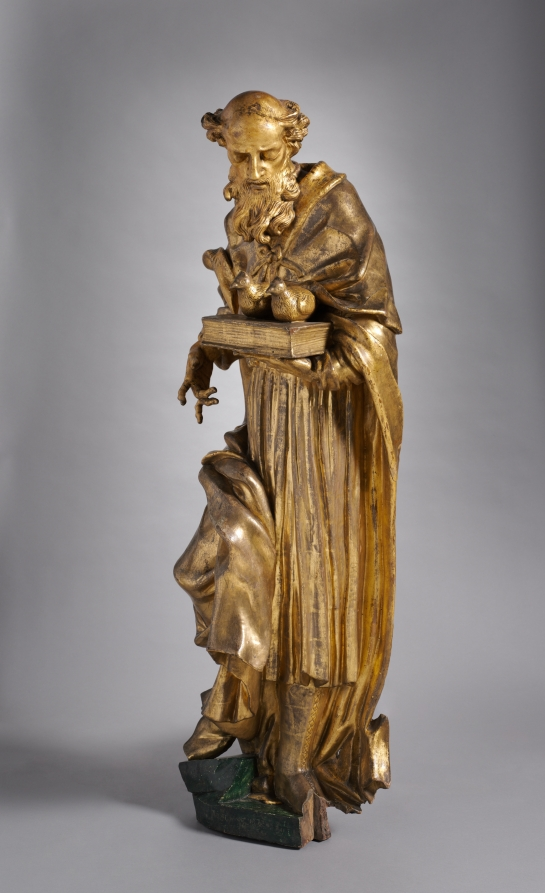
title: Saint Joachim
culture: Germany, 18th century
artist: Joseph Anton Feuchtmayer (German, 1696–1770)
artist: or Circle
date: c. 1760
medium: gilded wood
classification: Sculpture